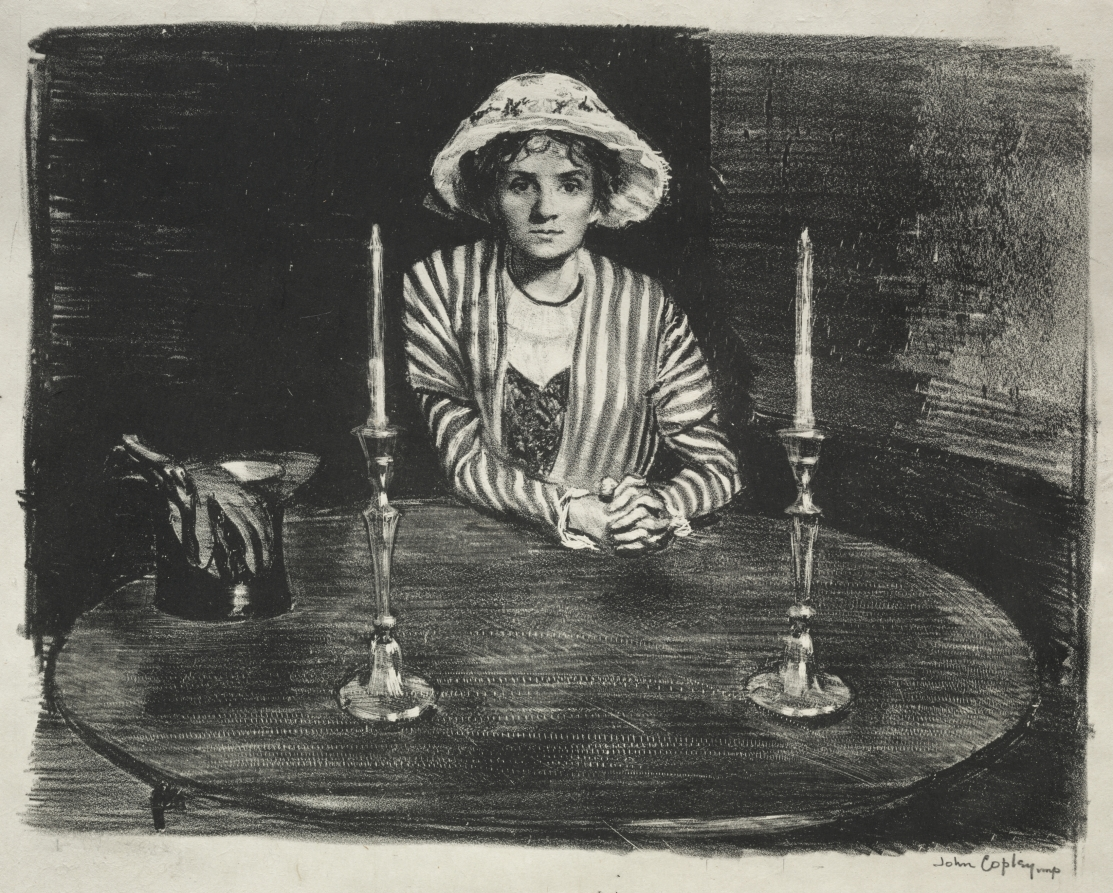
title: Study No. 4: Waiting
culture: England, 20th century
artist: John Copley (British, 1875–1950)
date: 1924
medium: lithograph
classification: Print